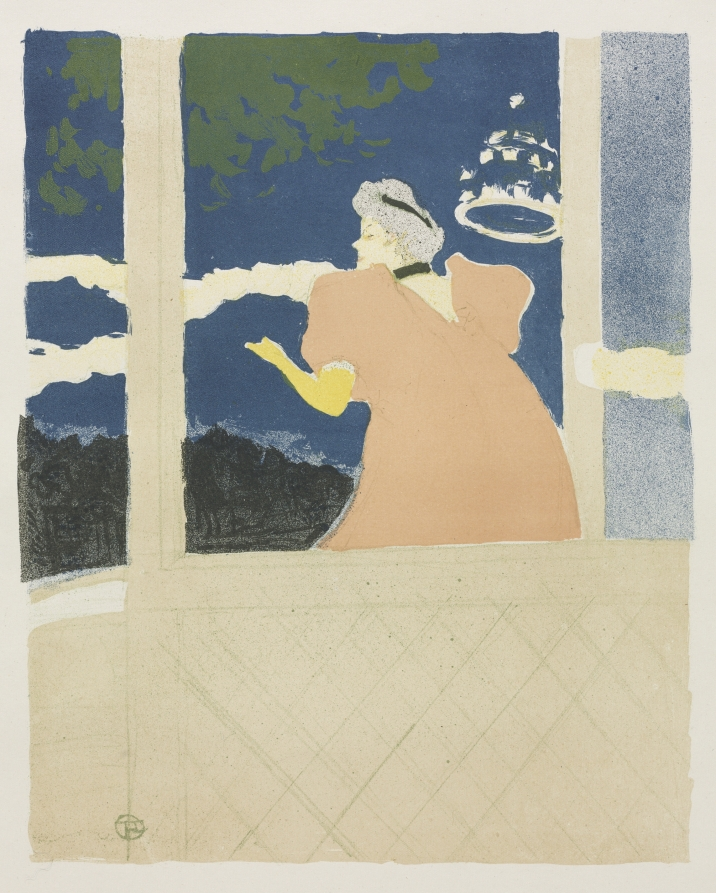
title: Aux Ambassadeurs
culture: France, 19th century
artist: Henri de Toulouse-Lautrec (French, 1864–1901)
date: 1894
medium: lithograph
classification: Print